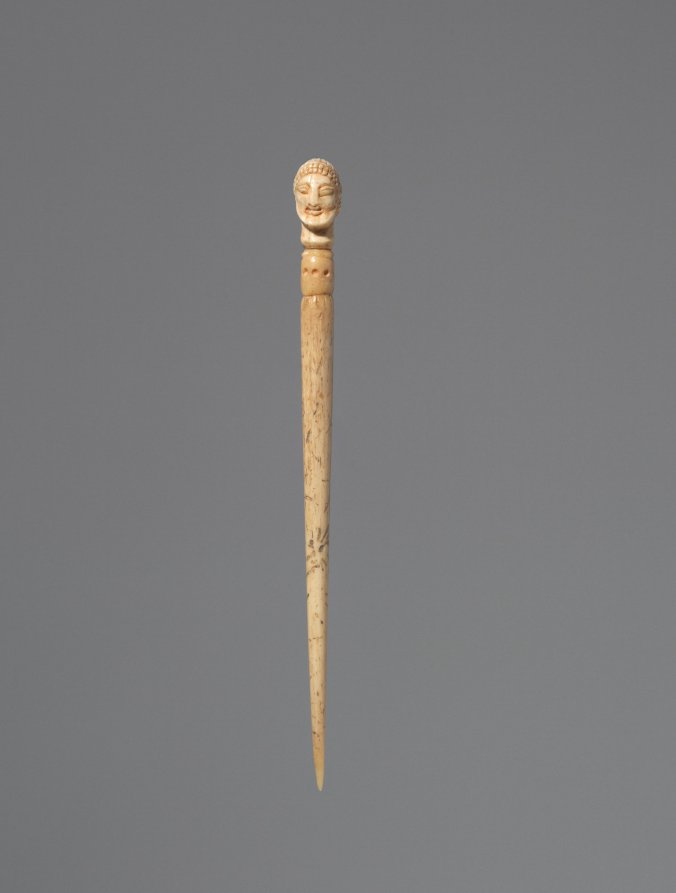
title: Hairpin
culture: Greece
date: 500–450 BCE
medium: ivory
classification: Ivory